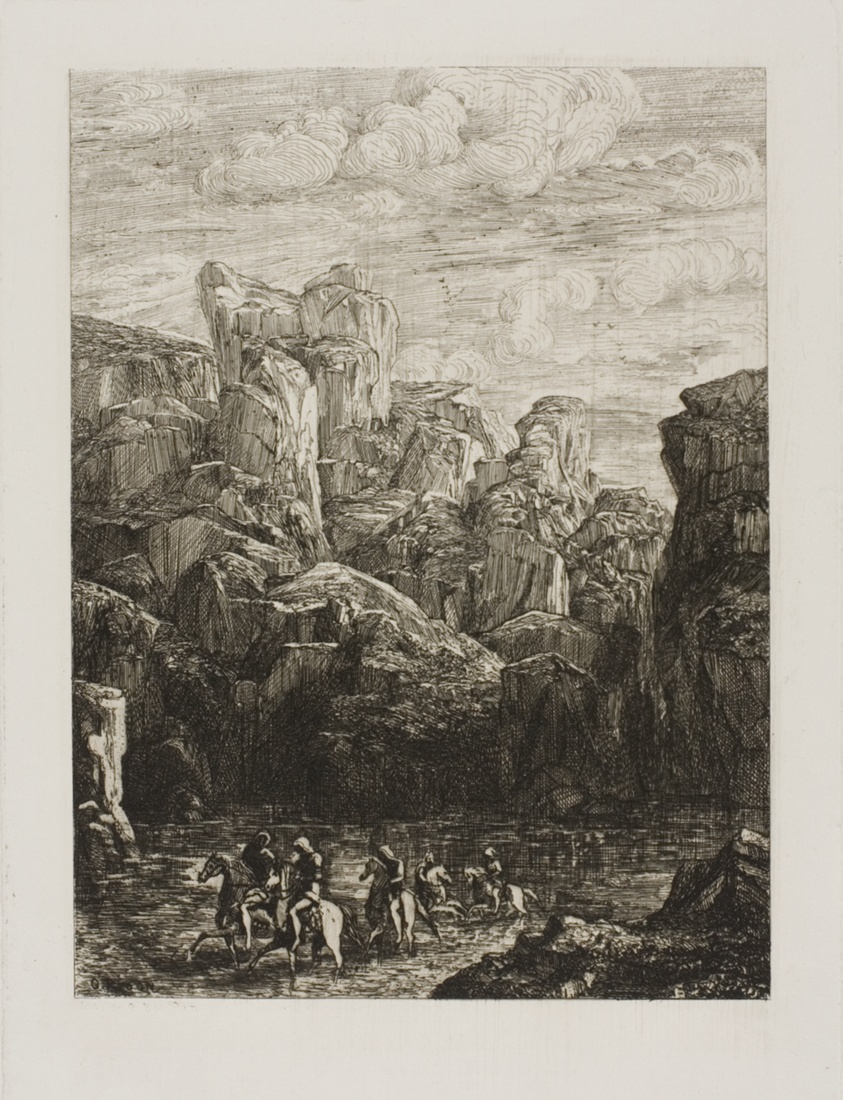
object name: Print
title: The Ford: Landscape with Horsemen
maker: Odilon Redon (French, 1840-1916)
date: 1865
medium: Etching on ivory wove paper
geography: France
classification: etching; print; prints and drawing; paper